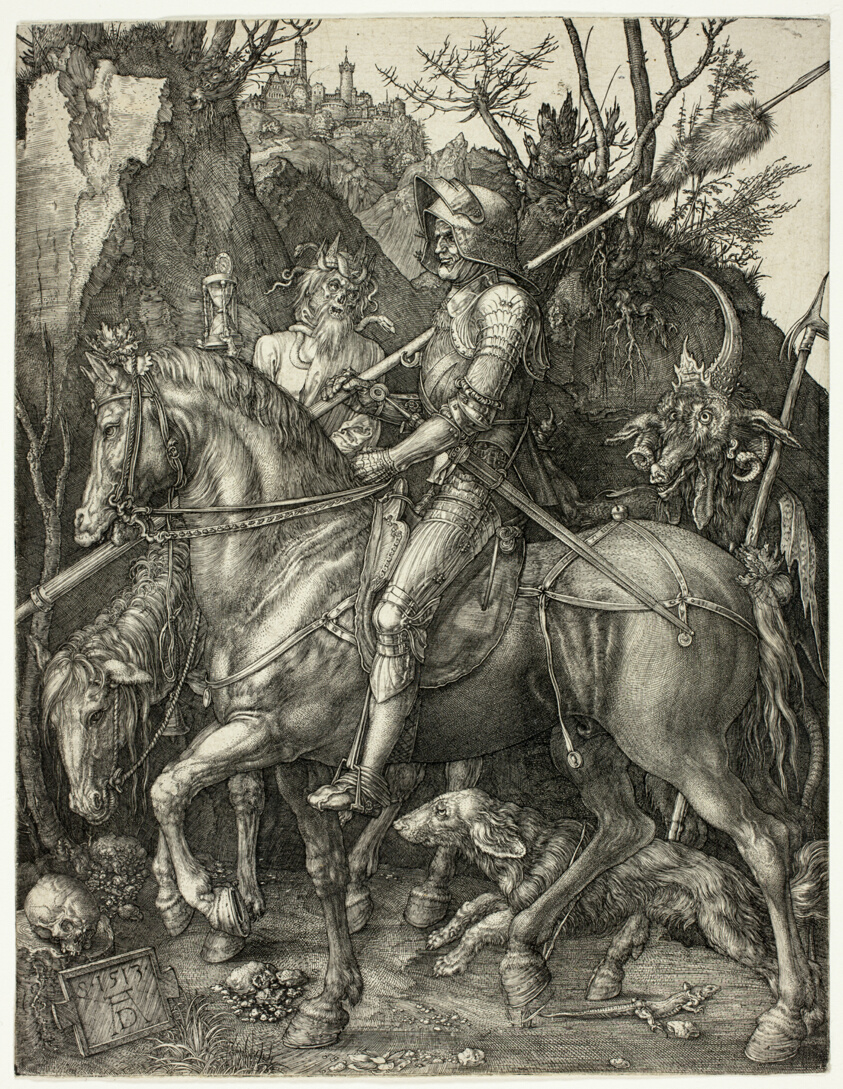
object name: Print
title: Knight, Death, and the Devil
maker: Albrecht Dürer (German, 1471-1528)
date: 1513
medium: Engraving in black on ivory laid paper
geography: Germany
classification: engraving; print; prints and drawing; paper